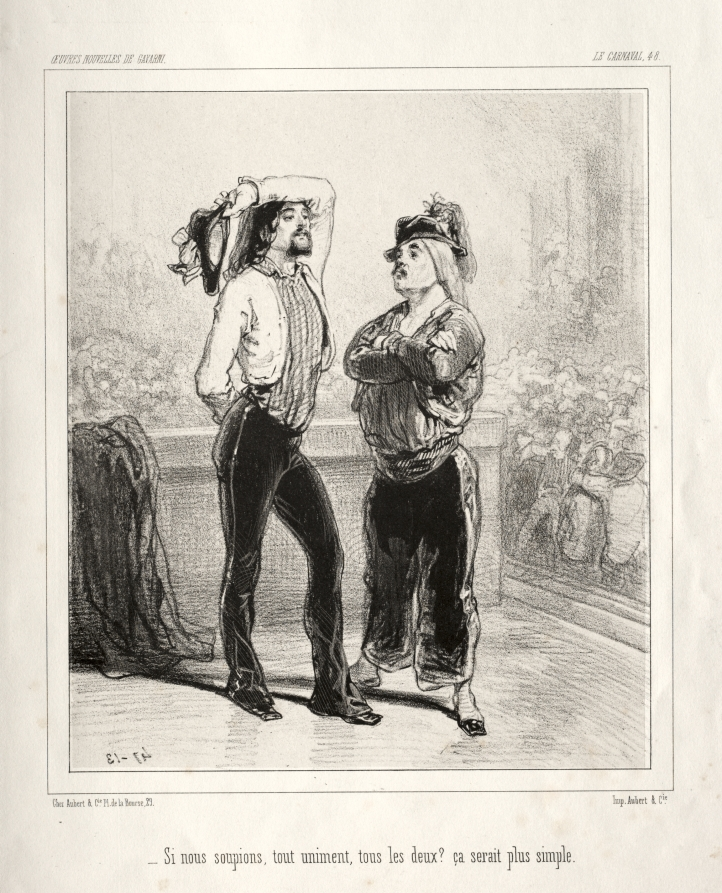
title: Carnaval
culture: France, 19th century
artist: Paul Gavarni (French, 1804–1866)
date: c. 1841–47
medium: lithograph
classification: Print